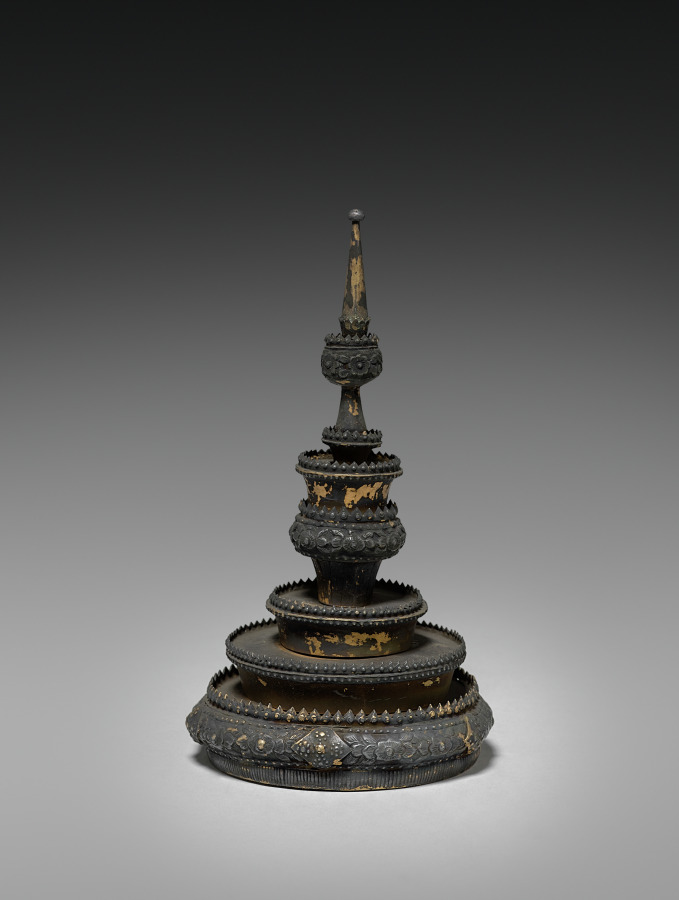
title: Burial Urn (lid)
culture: Siam, 19th century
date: 1800s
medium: gold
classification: Metalwork